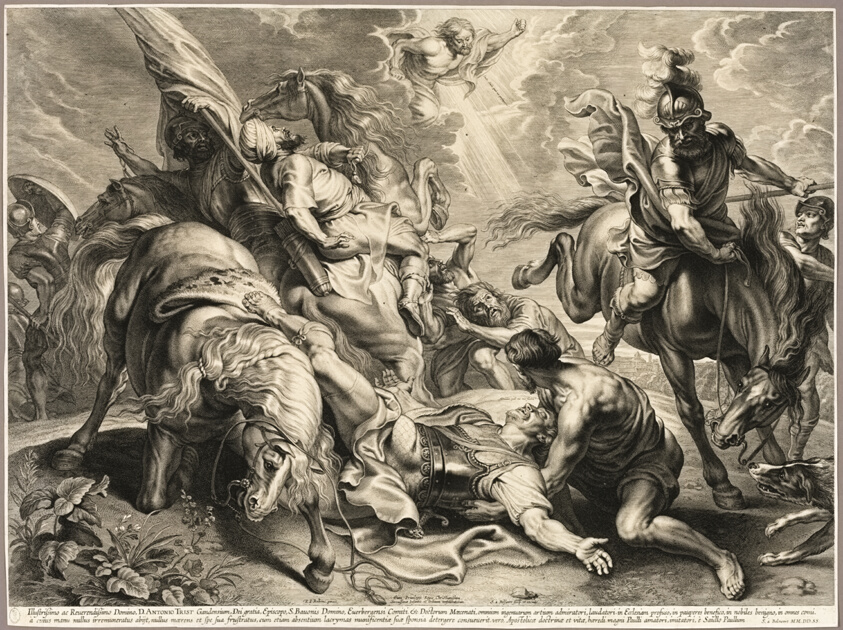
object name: Print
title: The Conversion of Saint Paul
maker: Schelte Adamsz. Bolswert (Dutch, active in Flanders, c. 1586–1659); after Peter Paul Rubens (Flemish, 1577–1640)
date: 1621/33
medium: Engraving in black on cream laid paper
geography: Netherlands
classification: engraving; paper; print; prints and drawing